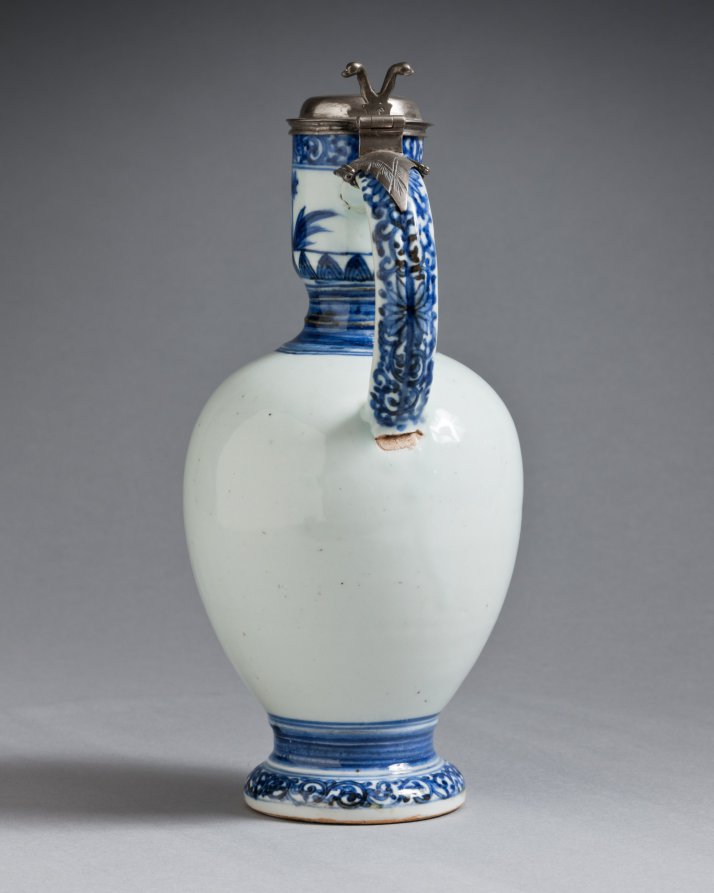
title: Jug with Silver Mounts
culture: Japan, Edo period (1615–1868)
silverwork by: Barent van Leeuwen (Dutch, 1637–1682)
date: c. 1662–76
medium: porcelain with underglaze blue decoration and silver mounts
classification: Ceramic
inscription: [on silver]: town mark for Amsterdam; lion rampant crowned (alloy mark for 0-934 silver); d (date letter for 1666), maker's mark of Barent van Leeuwen.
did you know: The coat of arms on this jug are those of the Valckenier family, active in the Dutch East India Company.